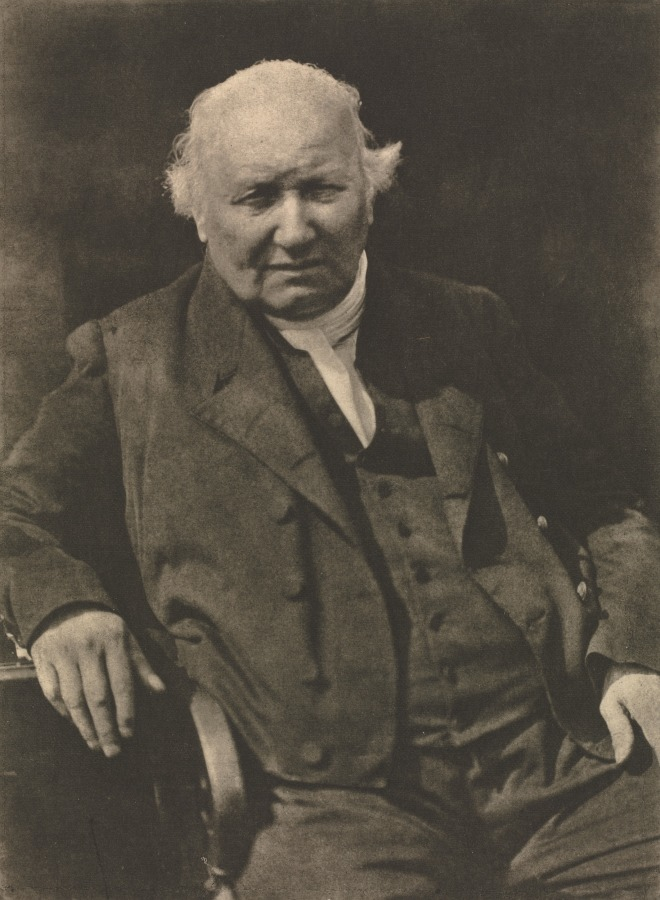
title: Camera Work: Principal Haldane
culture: England, 20th century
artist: David Octavius Hill (British, 1802–1870)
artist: and Robert Adamson (British, 1821–1848)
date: 1912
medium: photogravure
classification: Bound Volume